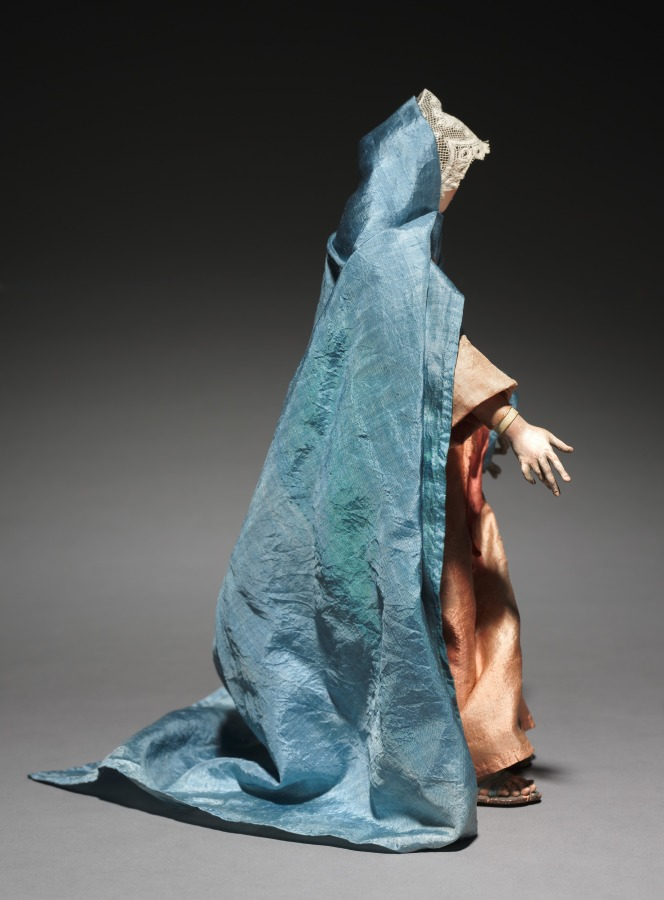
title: Figure from a Crèche: Virgin Mary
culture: Italy, Naples, late 18th-early 19th century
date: 1780–1830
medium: painted wood and terracotta with various textiles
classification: Sculpture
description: The practice of creating scenes of the Nativity for the home dates from the early 1700s in Italy, where people began to set up doll-like figures of about a foot or less in height. The custom was particularly popular in Naples around 1800, where crèche scenes (crèche means cradle, or crib) included many figures, whose heads and hands of painted terracotta, stuffed cloth bodies, and clothing adapted from contemporary local costumes gave them an amazingly realistic character. Representations of the birth of Jesus can be traced to the first few centuries of Christianity. Both living creatures and sculptural depictions of them were used from early times. By the late middle ages it was customary to create life-size figures of wood or stone, naturalistically painted, to represent the characters who participated in the events of Jesus's early life. These sculptures were then arranged in scenes illustrating one or both of the most important of these events, the Adoration of the Shepherds and the Adoration of the Magi-the three kings from the East who came to pay homage to the Christ child. Used in churches, these large figures were especially popular in Italy, Central Europe, Spain, and Portugal.